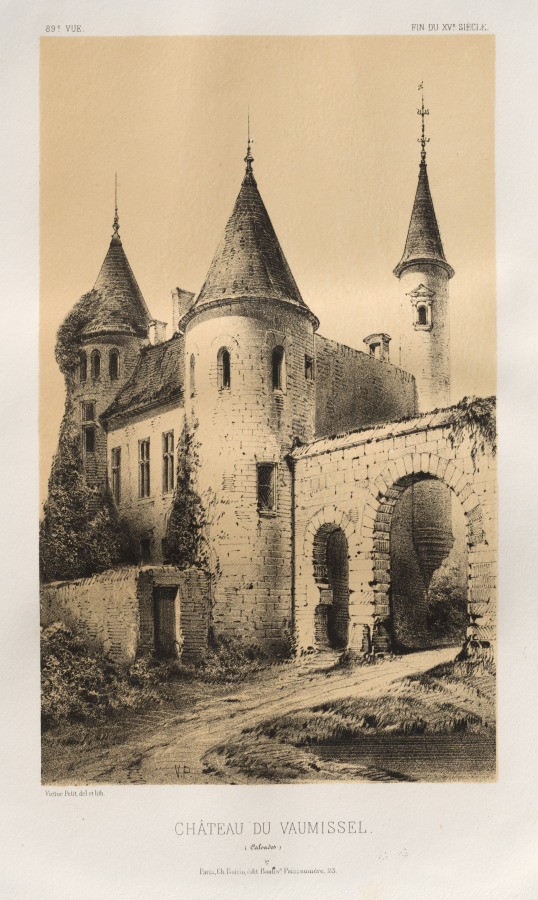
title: Architecture Pittoresque ou Monuments des XVeme. Et XVIeme. Siecles: Chateaux de France des XV et XVI Siecles: Pl. 89, Château du Vaumissel (Calvados)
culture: France, 19th century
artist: Victor Petit (French, 1817–1874)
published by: Charles Boivin (publisher and editor); Lith de Godard a Paris (printer)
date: 1860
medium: lithograph with tint stone, from portfolio of 100 lithographs with tint stone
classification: Print